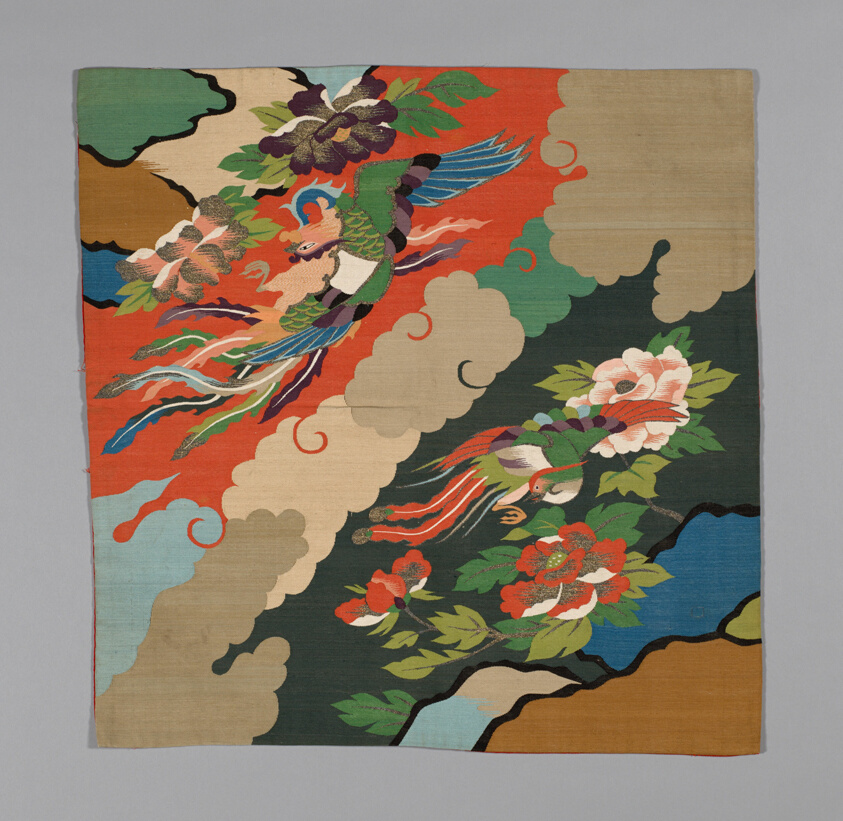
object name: Religious/Ritual Object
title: Uchishiki (Altar Cloth)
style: late edo, Japanism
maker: Japan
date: late Edo period (1789–1868), 1801/25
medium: Silk and gold-leaf-over-lacquered-paper strip, slit tapestery weave (kossu); backed with silk, plain weave, creped wefts; tassels: painted and plied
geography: Japan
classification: textile; weaving; ritual objects